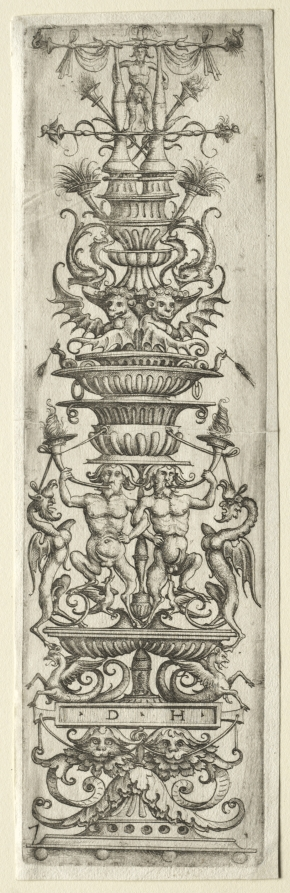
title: Ornament Fillet with Candelabre-Ornament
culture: Germany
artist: Daniel Hopfer (German, c. 1470–1536)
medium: etching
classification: Print